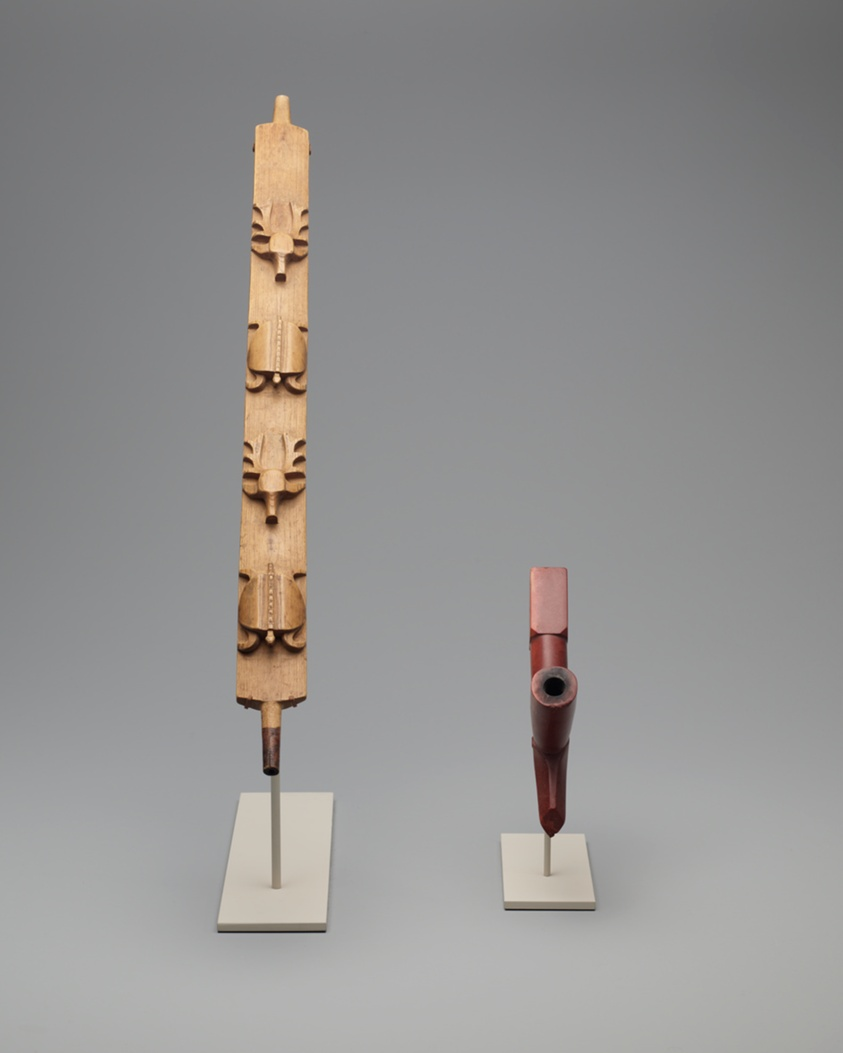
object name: Religious/Ritual Object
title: Pipe Bowl and Effigy Stem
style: cheyenne, plains indian, native american, americas, native north american, Arts of the Americas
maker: Artist unknown (Southern Cheyenne, Tsistsistas); Central or Northern Plains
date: 1880–90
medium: Wood and catlinite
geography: Central Plains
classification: pipe; art of the americas; ritual objects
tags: deer, pipe, stem, turtle